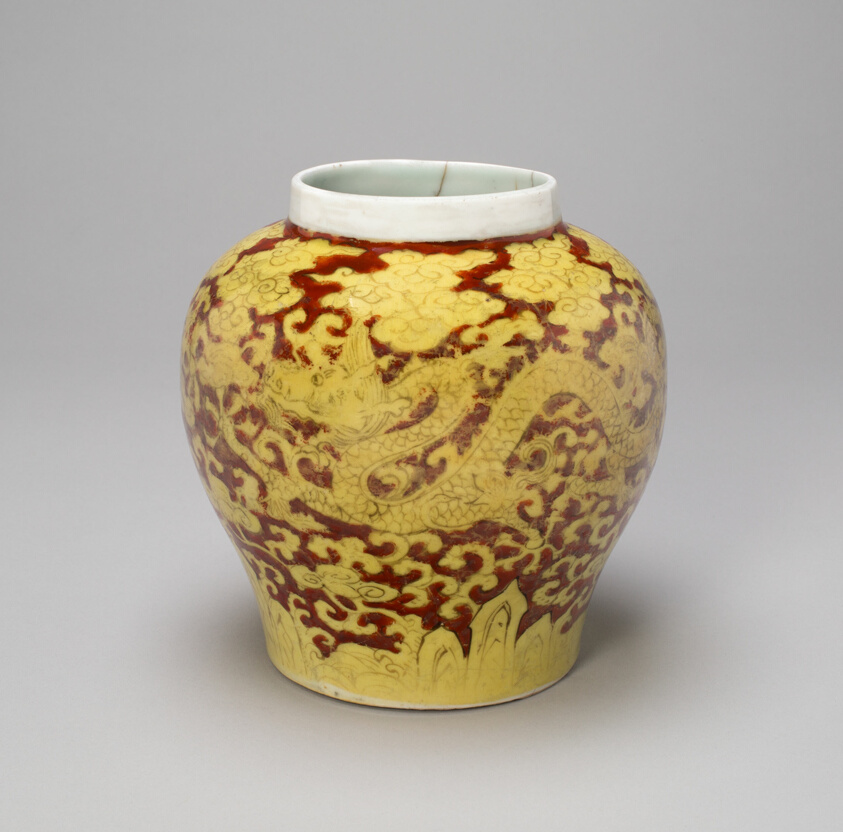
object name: Vessel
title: Jar with Paired Dragons Chasing Flaming Pearls amid Stylized Clouds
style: Chinese (culture or style)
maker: China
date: Ming dynasty (1368–1644), Jiajing reign mark and period (1522–1566)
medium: Porcelain painted in overglaze enamels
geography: China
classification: porcelain; asian art; ceramics; vessel